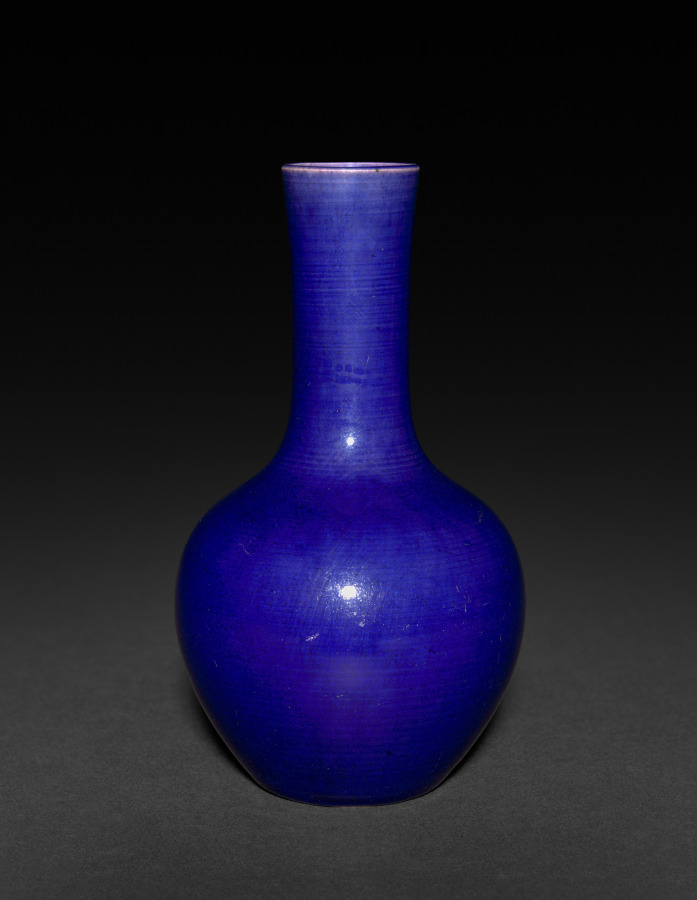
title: Bottle-Shaped Vase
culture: China, Qing dynasty (1644–1911), Qianlong reign (1736–95)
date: 1736–95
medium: porcelain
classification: Ceramic